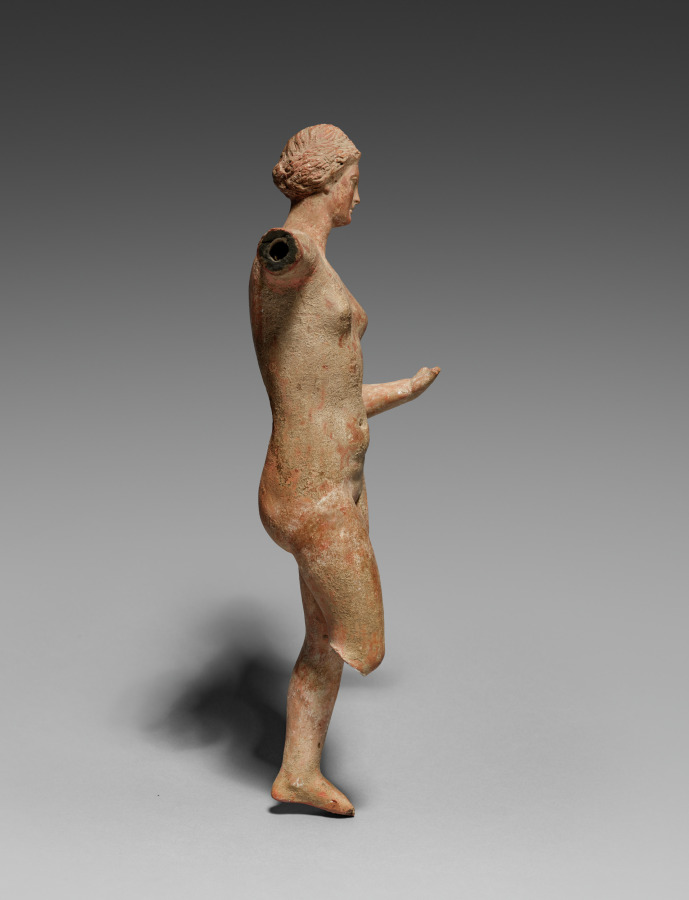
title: Aphrodite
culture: Greece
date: 400–200 BCE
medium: terracotta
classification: Sculpture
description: This nude figurine was likely inspired by the Aphrodite of Knidos by Praxiteles, a work that spawned countless reproductions of varying sizes in different media. Created from inexpensive terra cotta clay, this Aphrodite might have been commissioned as a votive offering by a person of modest means.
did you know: This Aphrodite may be admiring her reflection in a mirror once held in her left hand.